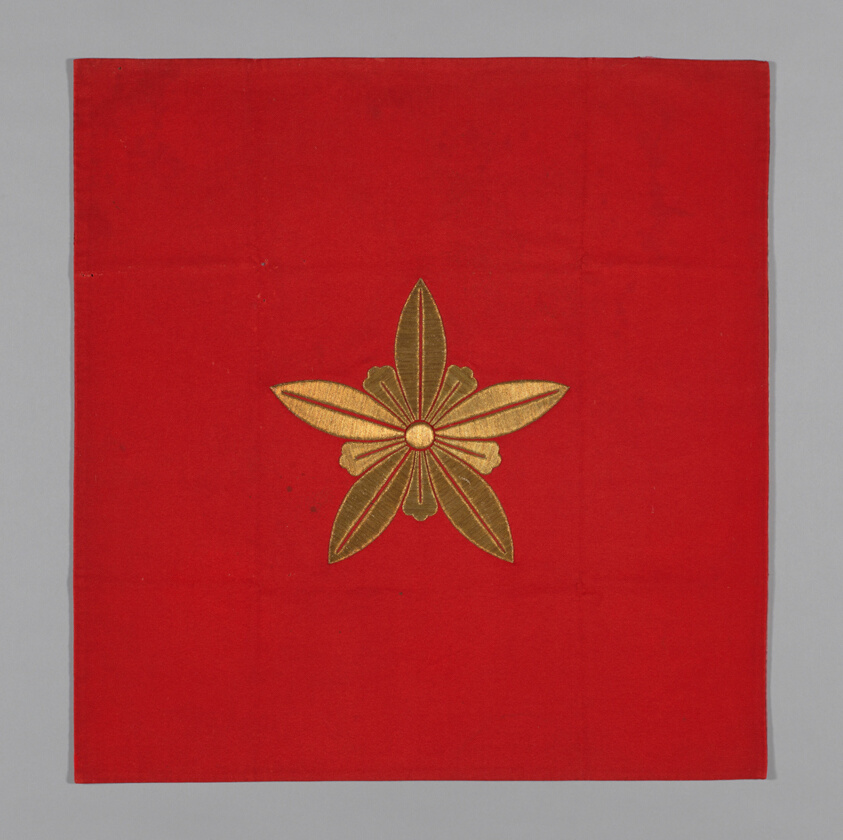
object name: Textile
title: Fukusa (Gift Cover)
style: meiji, Japanism, East Asian, asian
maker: Japan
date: early Meiji period (1868–1912), 1870/80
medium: Mon side: wool, plain weave; fulled (gorofukuren); embroidered with silk and gold-leaf-on-lacqueréd-paper-strip wrapped cotton in laidwork, couching and paper padded couching; lined with silk, weft-float faced 4:1 satin weave (shusu); outer edges interlined with paper; sewn with front and lining matched in size (Tachikiri awase)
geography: Japan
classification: textile; needlework (visual works); weaving